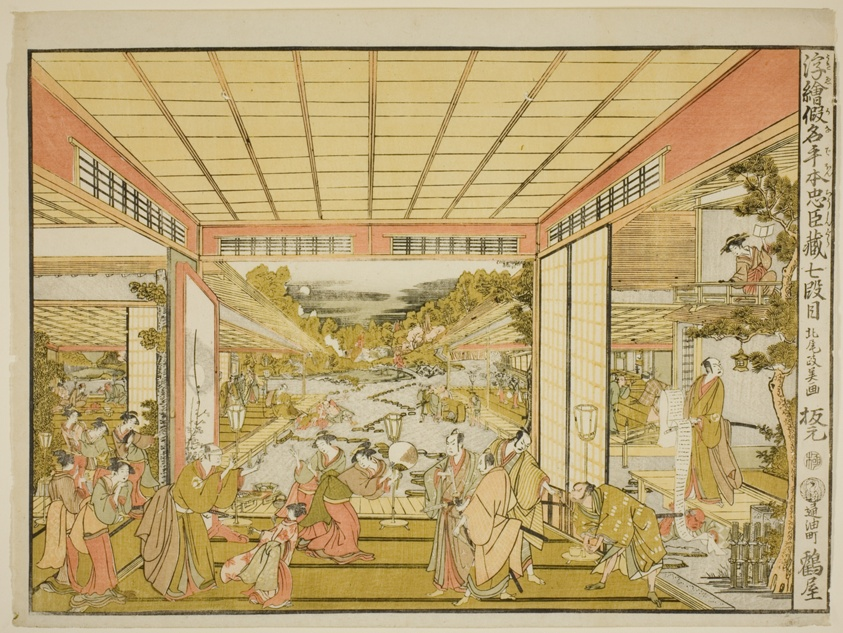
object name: Print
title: Act VII (Shichidanme), from the series "Perspective Pictures of the Storehouse of Loyal Retainers (Uki-e kanadehon Chushingura)"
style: Japanese (culture or style), edo (japanese period)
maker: Kitao Masayoshi (Kuwagata Keisai) (Japanese, 1764–1824)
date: c. 1791/94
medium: Color woodblock print; horizontal o-oban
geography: Japan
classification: woodblock; print